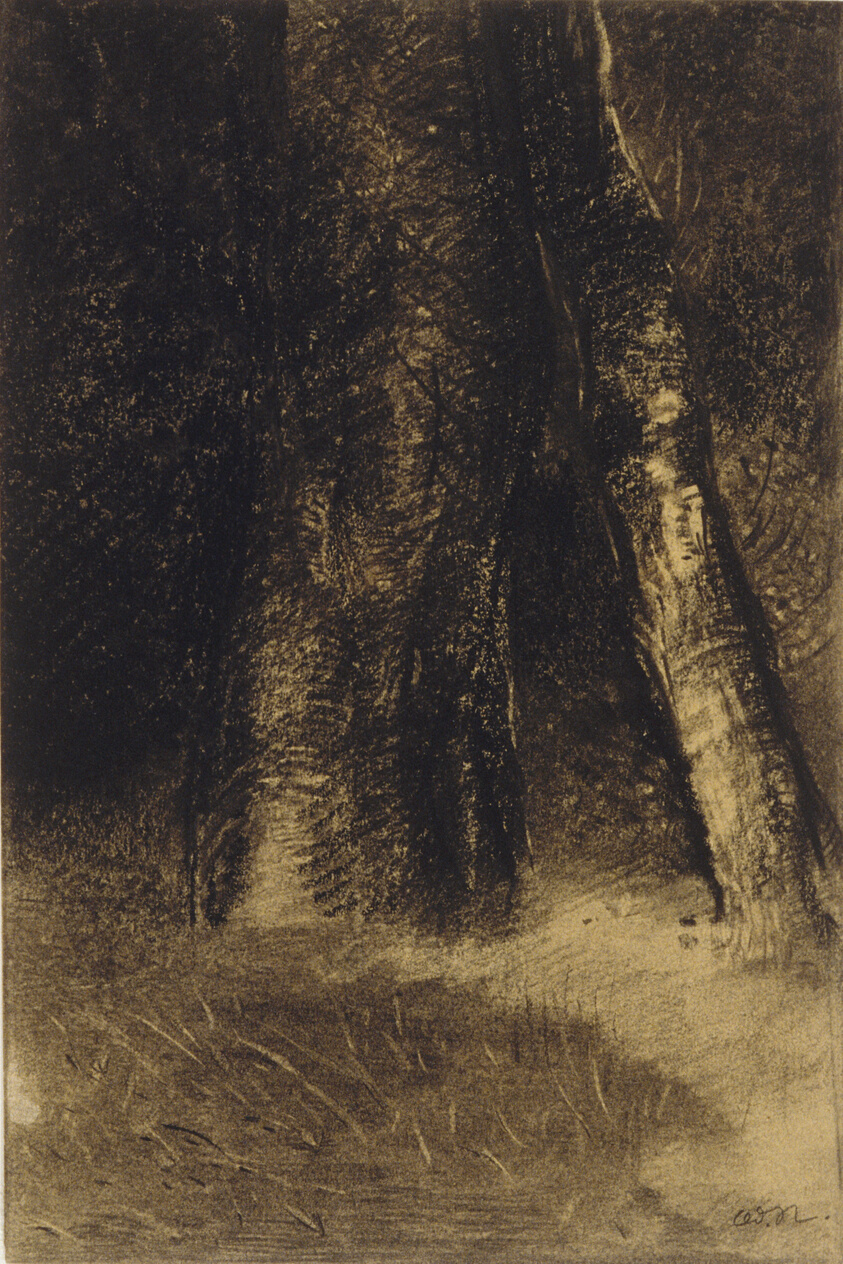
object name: Drawing and Watercolor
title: Sketch of Trees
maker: Odilon Redon (French, 1840-1916)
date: 1890/99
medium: Charcoal and black chalk with black pastel, stumping, scraping and erasing, and traces of brown charcoal(?), on ivory wove paper, discolored to cream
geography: France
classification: charcoal; drawings (visual works); prints and drawing; paper